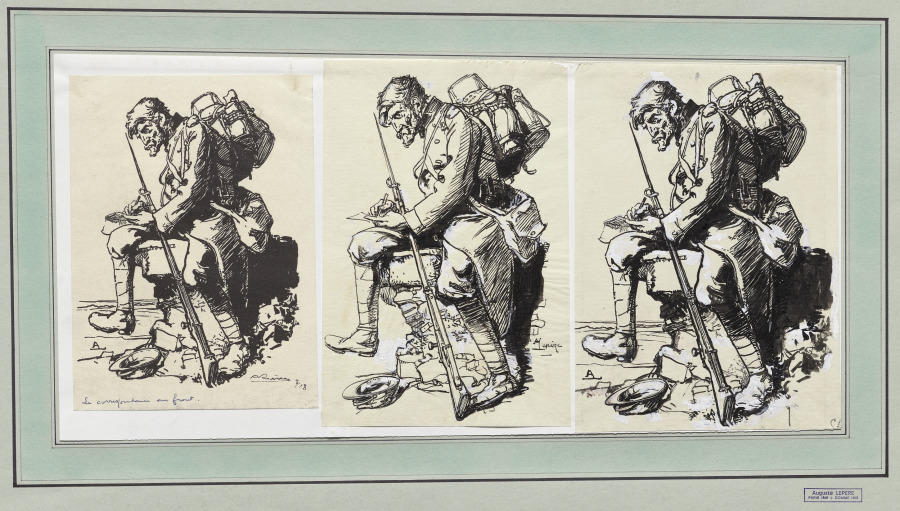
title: La Correspondance au front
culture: France, 20th century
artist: Auguste Louis Lepère (French, 1849–1918)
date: 1914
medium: brush and black ink over pencil and black crayon with white heightening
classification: Drawing